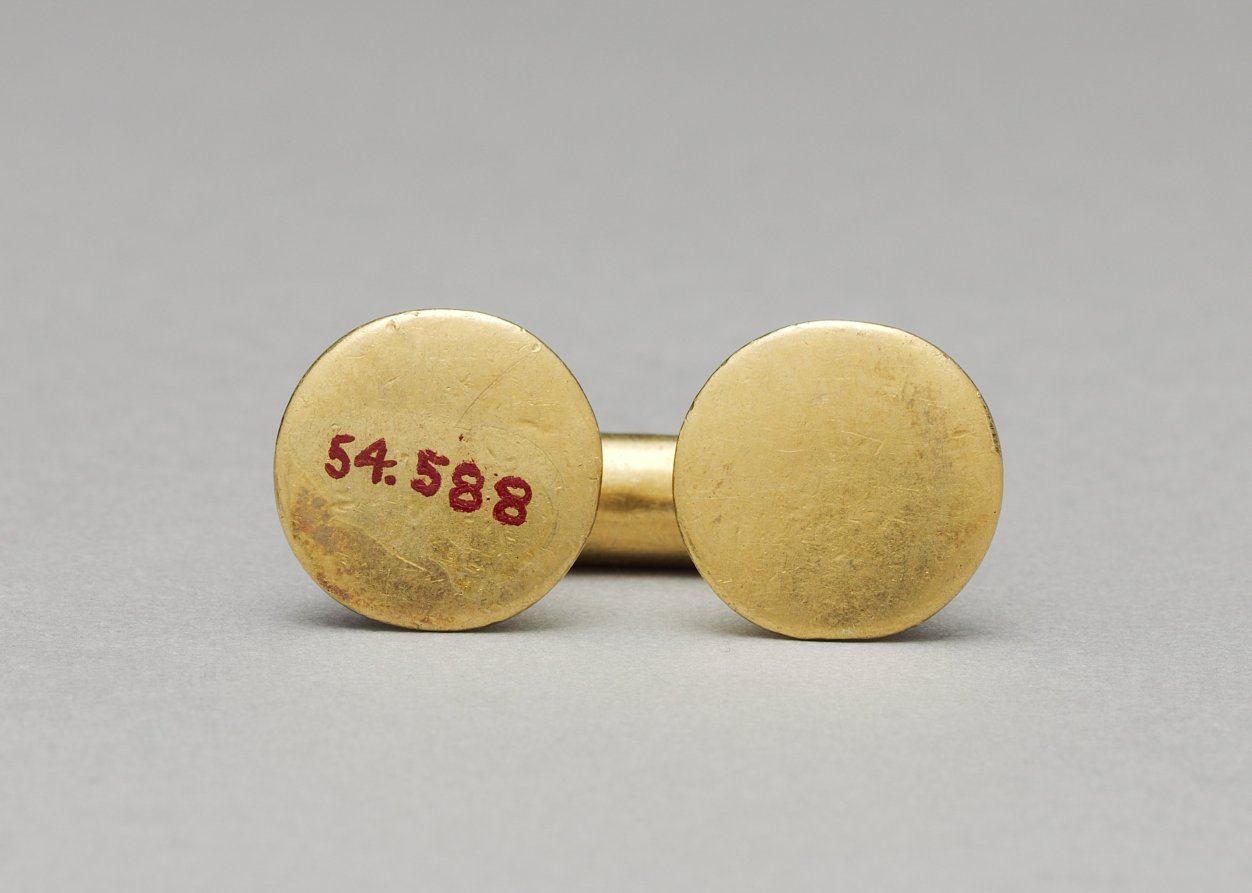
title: Nose Ornament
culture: Colombia, Sinú style, 5th-11th century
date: c. 400–1000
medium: hammered gold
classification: Jewelry